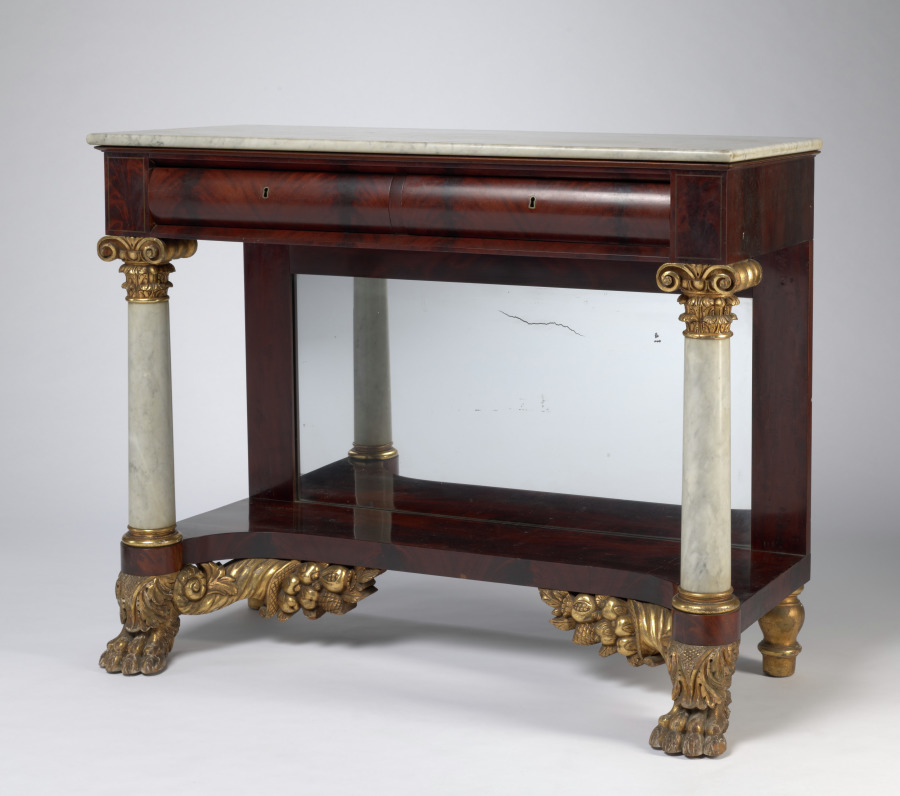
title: Console Table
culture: America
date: 1820–30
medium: mahogany and mahogany veneer with marble top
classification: Furniture and woodwork